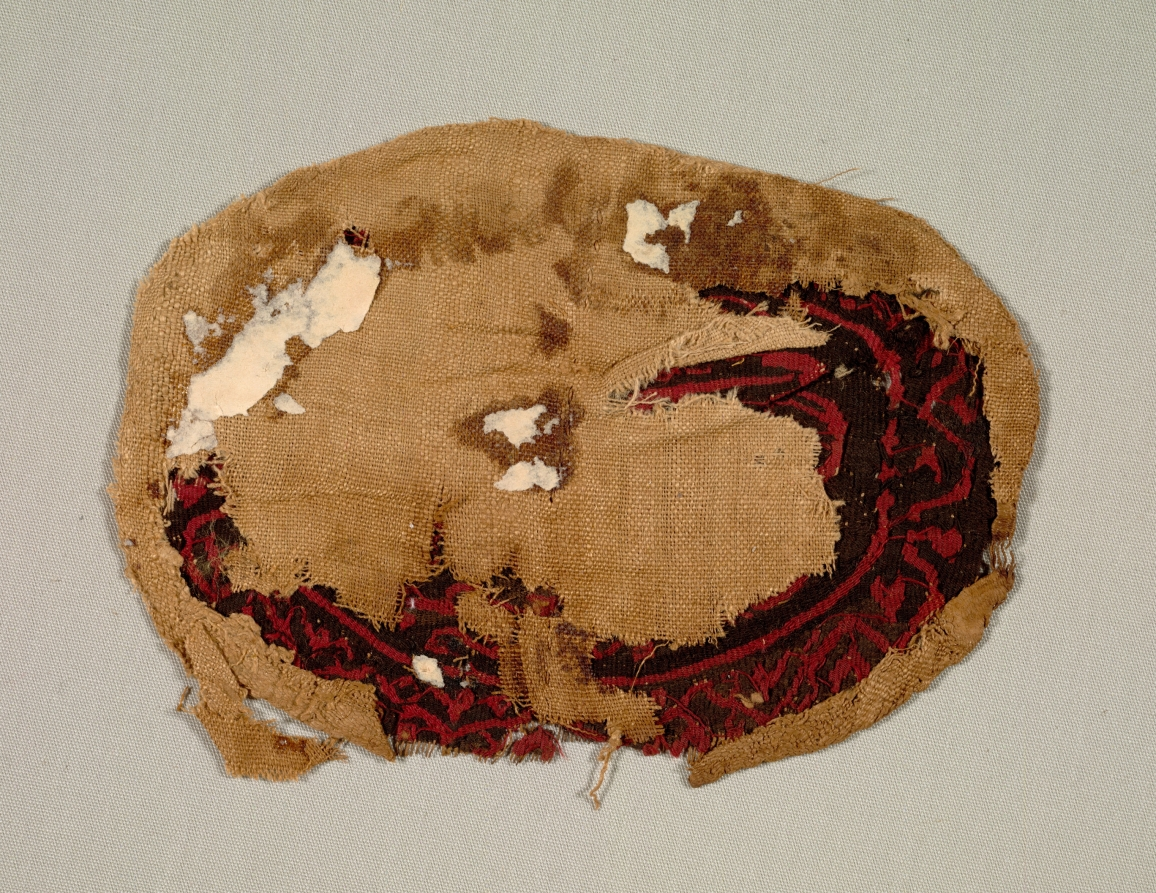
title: Two Confronted Animals from a Tunic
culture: Egypt, Islamic period, Abbasid, 8th - 9th century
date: 700s-800s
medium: plain weave with slit-tapestry weave, applied; dyed wool, undyed linen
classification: Textile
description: Two spotted animals flank a simplified tree with more roots than leaves, framed by an angular vine. The nearly symmetrical pattern, woven in simple tapestry weave, was influenced by more complex weaves, visible in the silks displayed below.